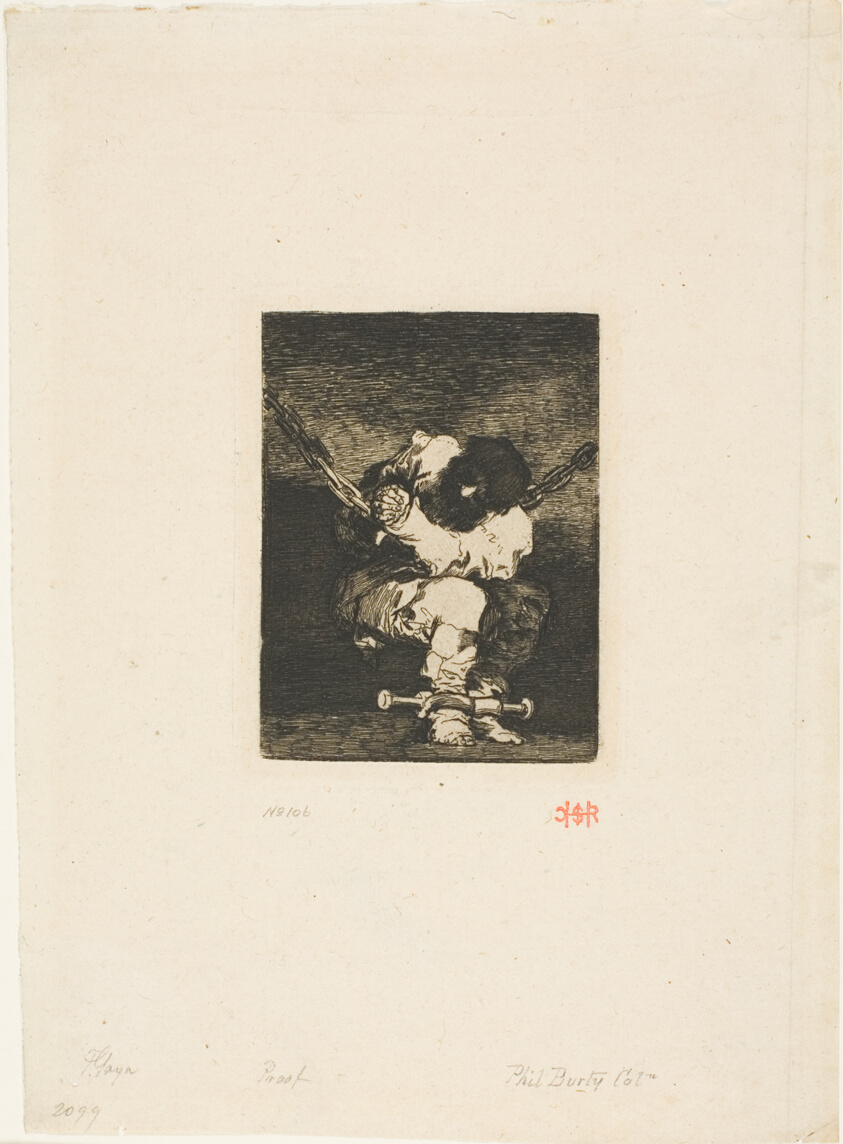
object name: Print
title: The Custody is as Barbarous as the Crime ("The Little Prisoner")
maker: Francisco José de Goya y Lucientes (Spanish, 1746-1828)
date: 1810/20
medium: Etching and burin on cream laid paper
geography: Spain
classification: etching; print; prints and drawing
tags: war